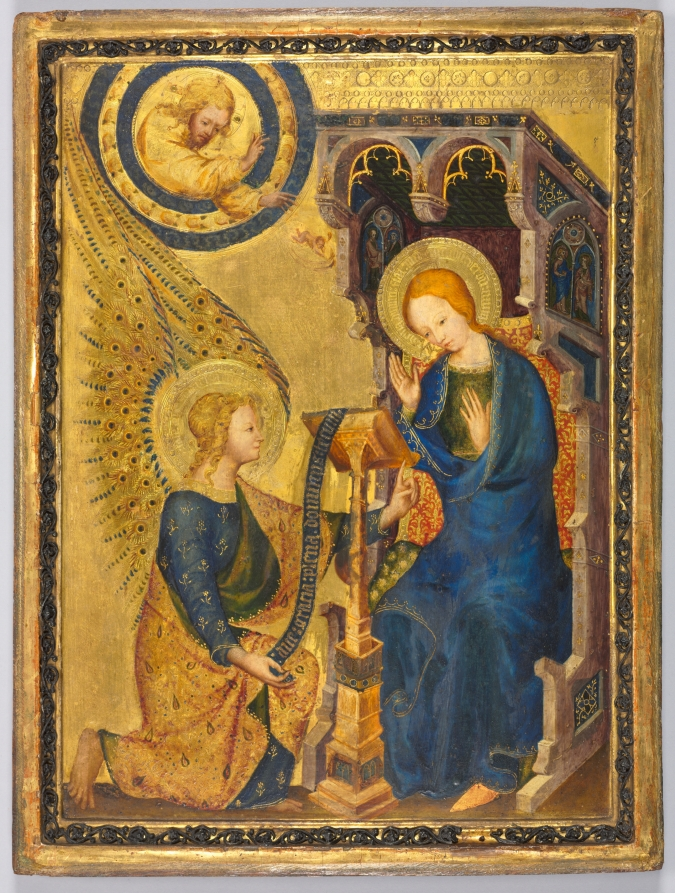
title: The Annunciation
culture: Netherlands, or possibly France, 14th century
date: 1380s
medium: tempera and oil with gold on wood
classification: Painting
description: This small but opulent panel painting was once joined to another panel with hinges to form a diptych. Given its small size, its original function was for private devotional use. It could be folded like a book when not in use and was highly portable. The missing panel has not been positively identified but probably represented another biblical scene like the Crucifixion. The painting’s refined and ornate style reflects the courtly aesthetic that appealed to royal and aristocratic patrons in the decades around 1400. On the panel’s richly tooled reverse (not visible) are the arms of the house of Hainault quartered with those of Bavaria. While this coat of arms is certainly that of the work’s patron, probably a member of the united dynasties of Hainault and Bavaria, their identity remains elusive.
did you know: In this depiction of Gabriel, the angel's wings resemble the feathers of a peacock.